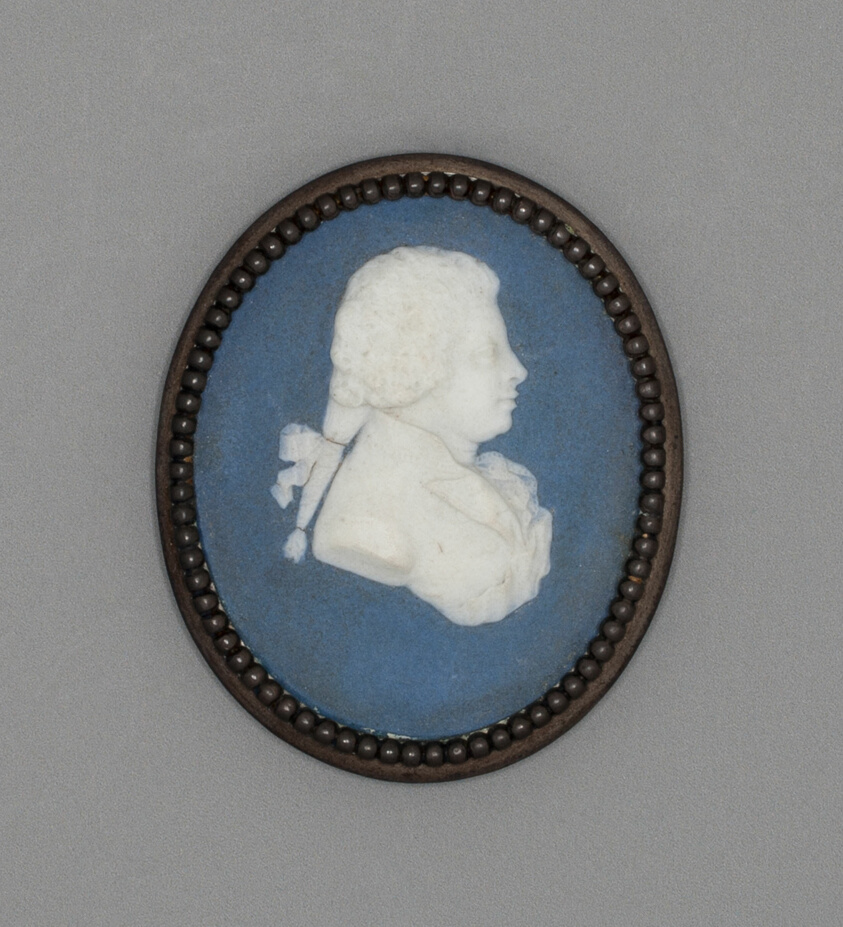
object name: Ceramics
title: Plaque with Portrait of Prince Edward, Duke of Kent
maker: Wedgwood Manufactory (England, founded 1759)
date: Late 18th century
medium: Stoneware (jasperware)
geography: Burslem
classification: sculpture; stoneware; european decorative arts; ceramics